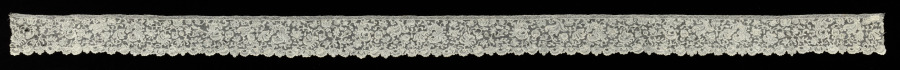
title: Lace Edging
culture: France, Alençon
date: 1700s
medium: Linen: needle lace (Point d'Alençon)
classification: Lace